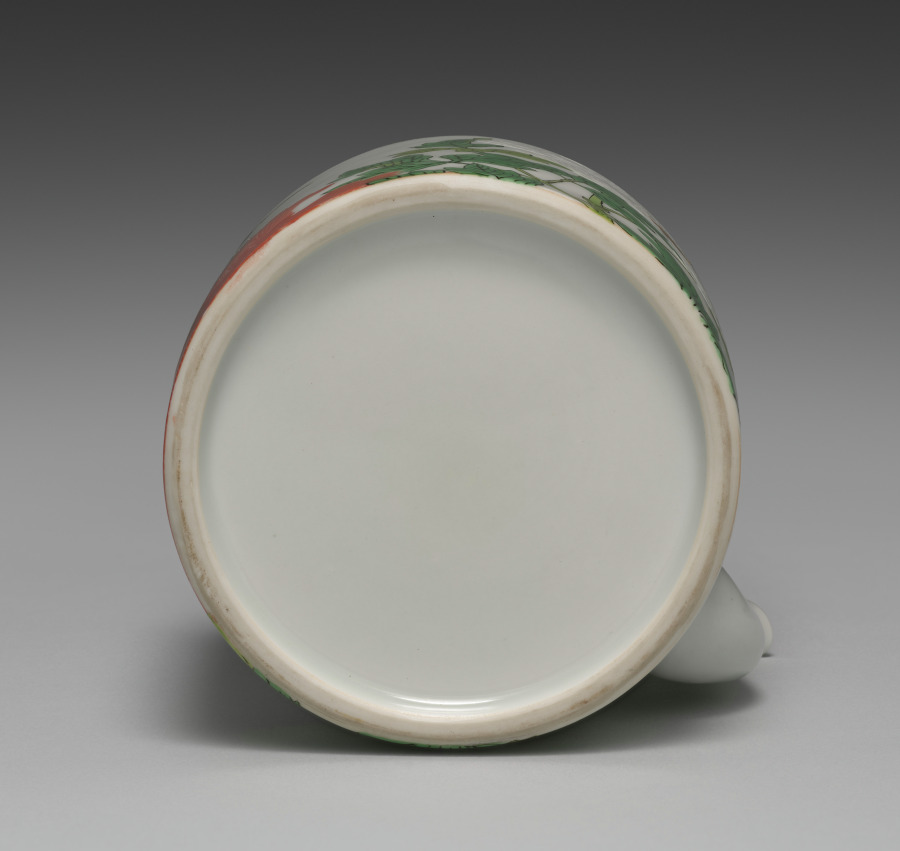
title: Sake Pourer with Flowers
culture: Japan, Meiji period (1868–1912)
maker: Seifū Yohei III (Japanese, 1851–1914)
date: 1893–1914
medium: Porcelain with molded design, overglaze color enamel, and metal handles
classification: Ceramic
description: This sake pourer is of a type called a chōshi. It is elaborately decorated with flowers in overglaze enamels in several colors, including black for the contour lines of leaves and stems; orange, white, gold, and two shades of green for the peonies; and purple for the thistles. The white blossoms have been built up with white enamel, then incised for a white-on-white eect; the orange and purple use an absence of color to produce the contours of individual petals. Yohei III referred to his works in multicolor overglaze enamels as “hundred flower brocades” (hyakka nishiki). Two small nyoi (C. ruyi) staff-head motifs, molded in clay and applied to either side of the lid, create handle rests, as well as natural places for the thumb and index finger of one hand to rest, so one can both secure the lid and steady the pour, while the handles are held in the other hand. The top of a nyoi staff resembles the curled cap of the reishi. Such scepters are imagined to be found in the hands of sages, Daoist immortals, or Buddhist deities and connote lofty goings-on and favorable circumstances. Since this sake pourer is unsigned, it may have been made for imperial family members to give as a gift.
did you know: This sake pourer with purple thistles and orange peonies shows off Seifū Yohei III’s technique of enamels painted over the glaze.